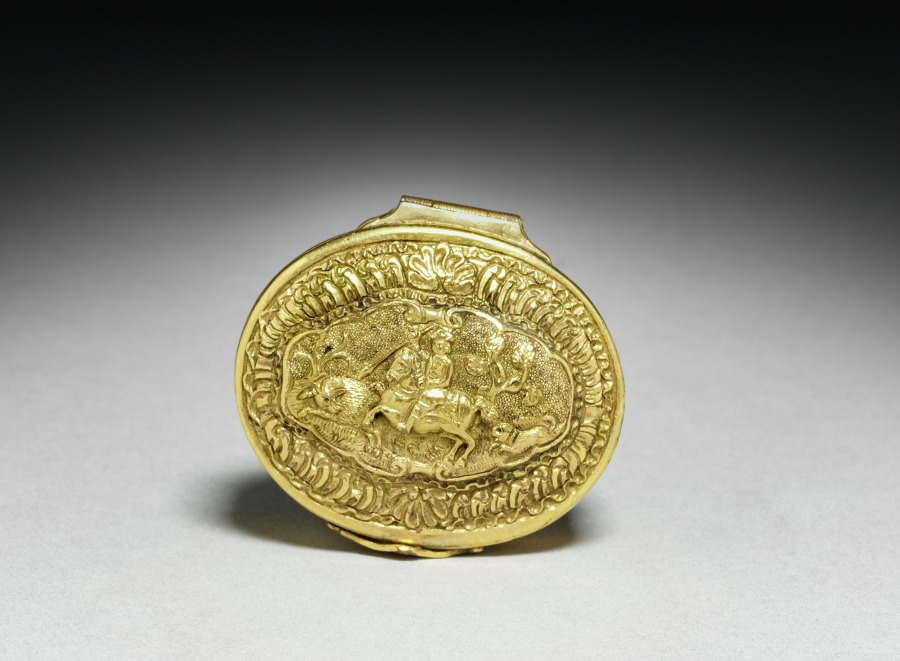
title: Box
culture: Germany, 18th century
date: 1730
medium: agate and gold or gilt metal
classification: Miscellaneous